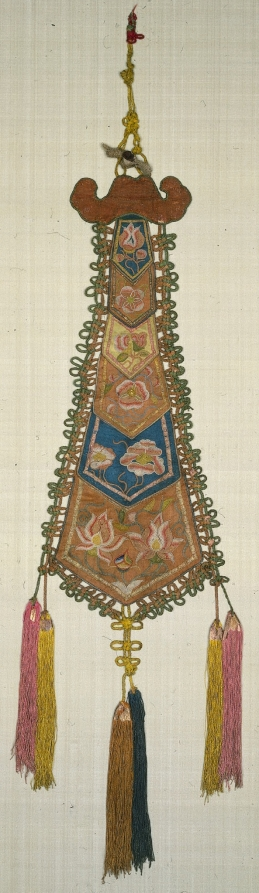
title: Pendant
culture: China, 14th century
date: 1300s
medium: needleloop embroidery and knotting; silk, silvered paper, gilded paper and gold thread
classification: Embroidery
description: Pendants were used extensively in Buddhist settings where they were attached to almost anything needing decoration: ritual objects, canopies, valances, pillars, and other architectural components. They could be made in a variety of ways. This example consists of a heading and six tiers, each embroidered separately and then attached, one to the next. The earliest known pendant of this type was found in Central Asia and dates from the Tang dynasty (AD 618-907). The 14th-century date of this pendant is indicated by the style of the flowers.